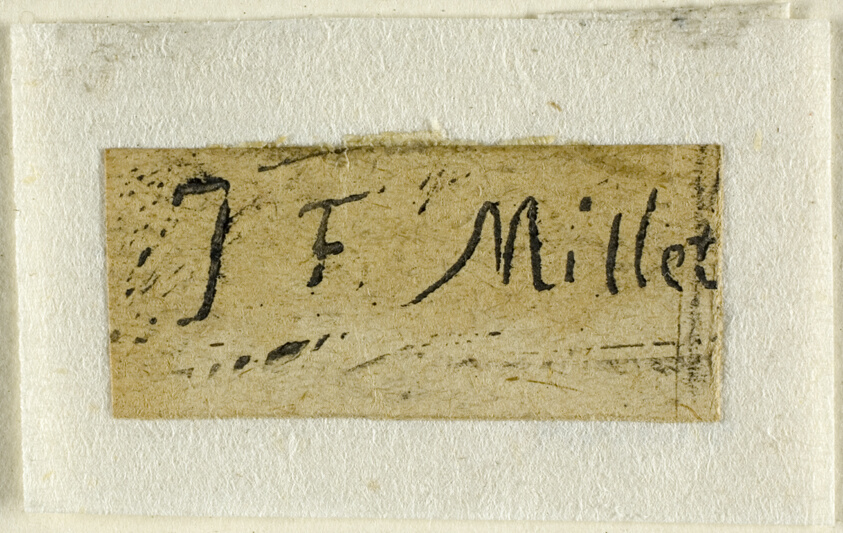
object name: Print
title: Signature Fragment from the Shepherdess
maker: Jean François Millet (French, 1814-1875); printed by Jean-Baptiste Millet (French, 1831-1906)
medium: Woodcut in black on tan wove China paper laid down on white Japanese hinge paper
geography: France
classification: woodcut; print; prints and drawing